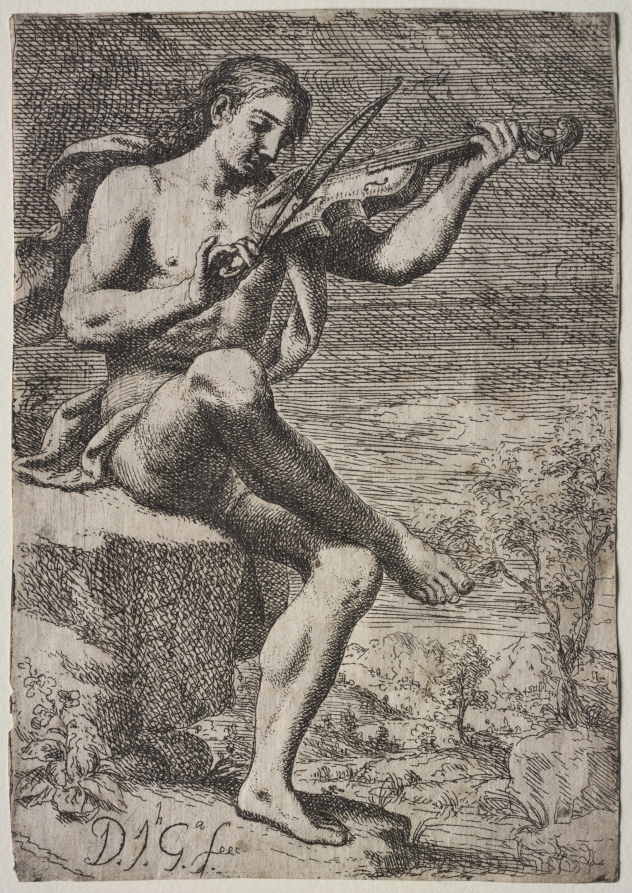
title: Nude Man Playing a Violin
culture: Spain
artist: Jose Garcia Hidalgo (Spanish, 1646–1717)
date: 1693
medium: etching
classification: Print